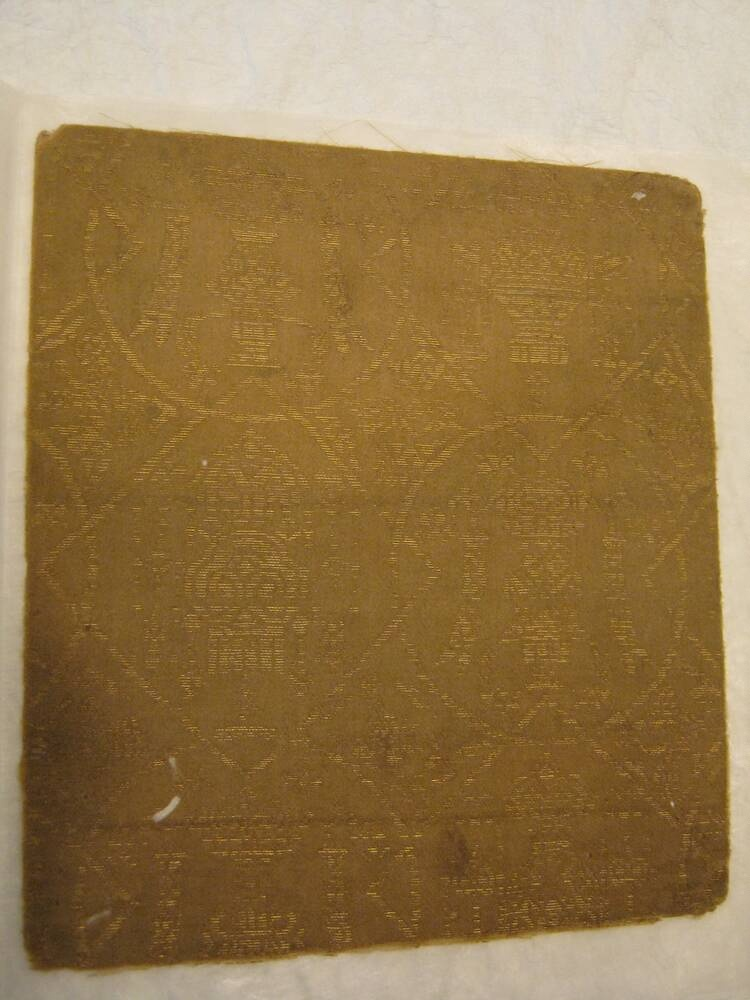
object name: Textile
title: Fragment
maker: China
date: Qing Dynasty (1644–1911), Mid 18th century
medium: Plain compound satin, silk and gilt paper; 3 strips to m.m.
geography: China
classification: textile; weaving